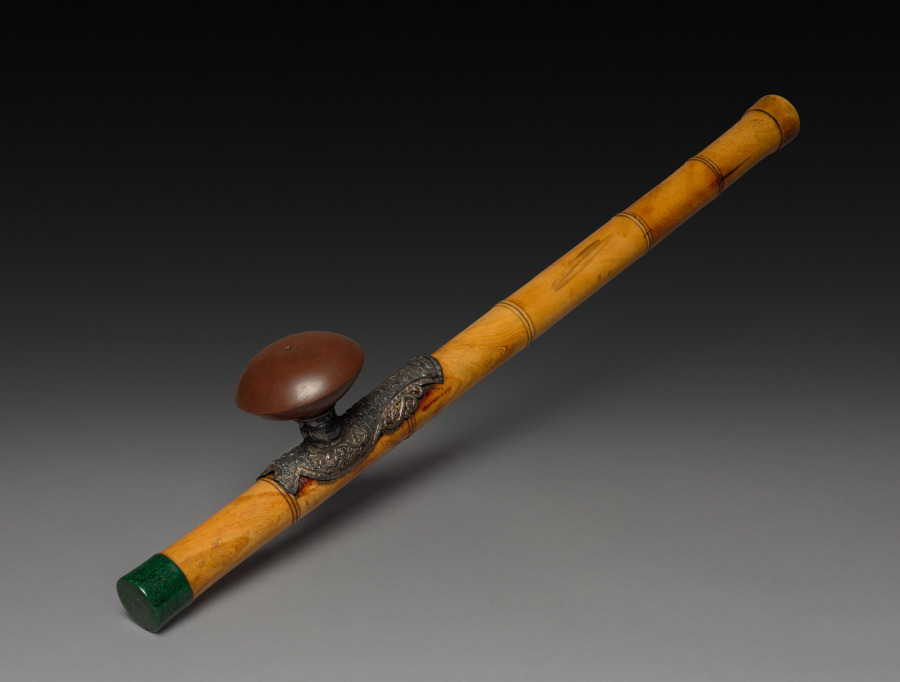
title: Opium Pipe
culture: China, Qing dynasty (1644-1911)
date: 1800s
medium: ivory with repoussé decoration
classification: Miscellaneous